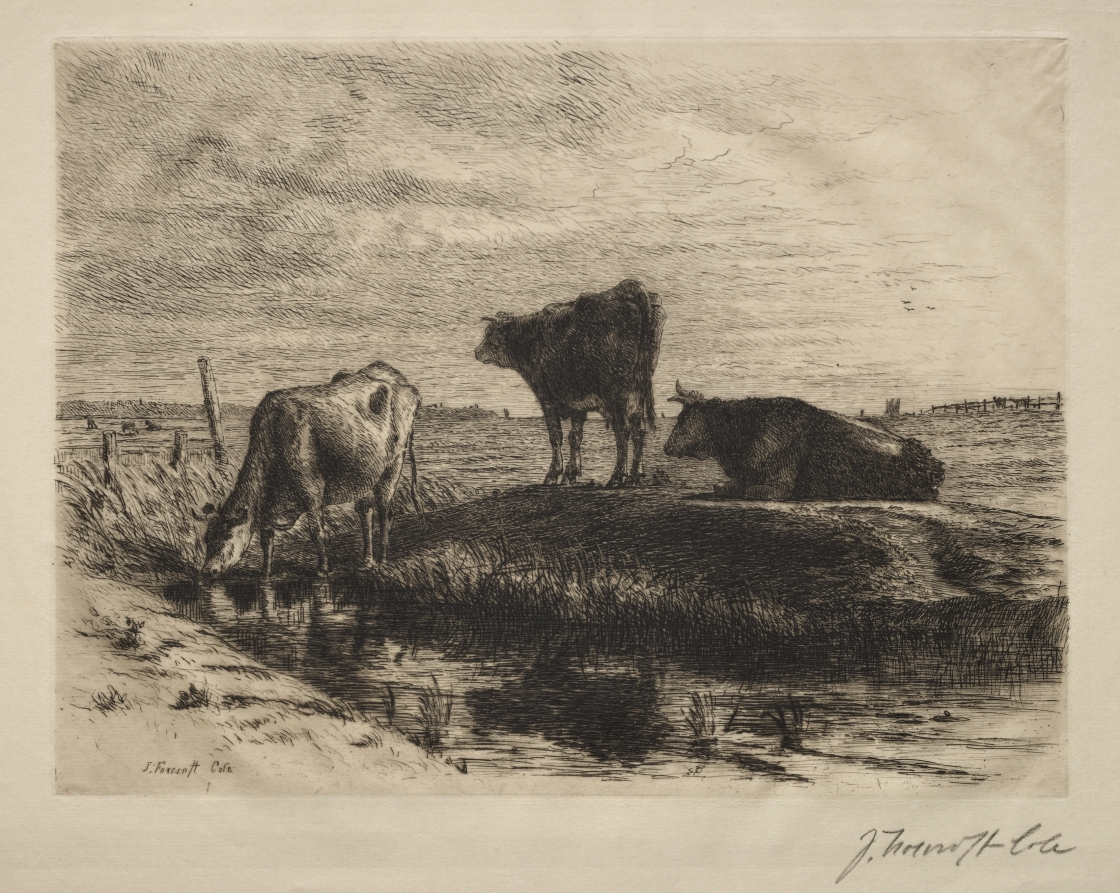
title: The Three Cows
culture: America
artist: Joseph Foxcroft Cole (American, 1837–1892)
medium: etching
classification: Print